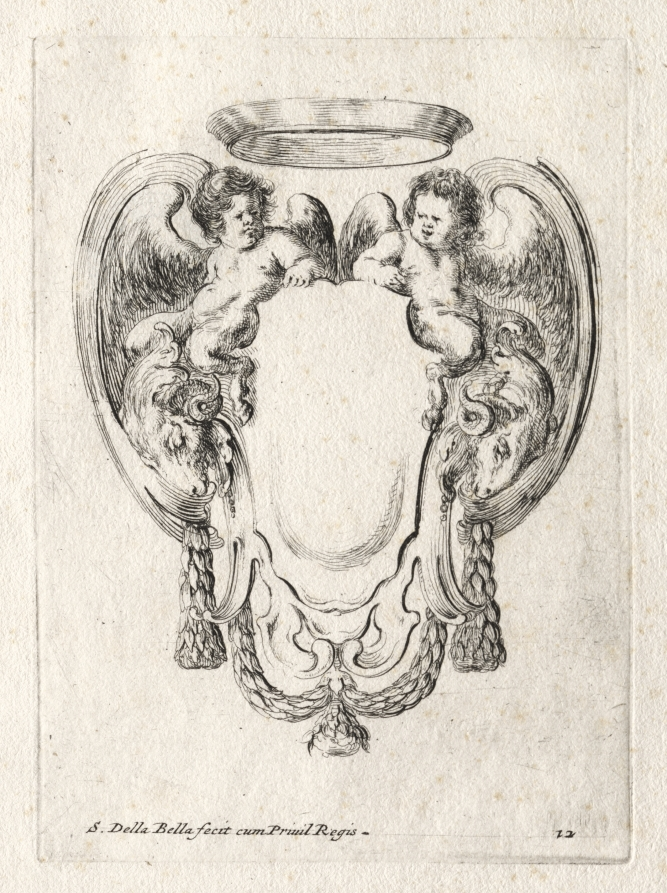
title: New Model for a Cartouche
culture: Italy, 17th century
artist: Stefano Della Bella (Italian, 1610–1664)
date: 1647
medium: etching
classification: Print